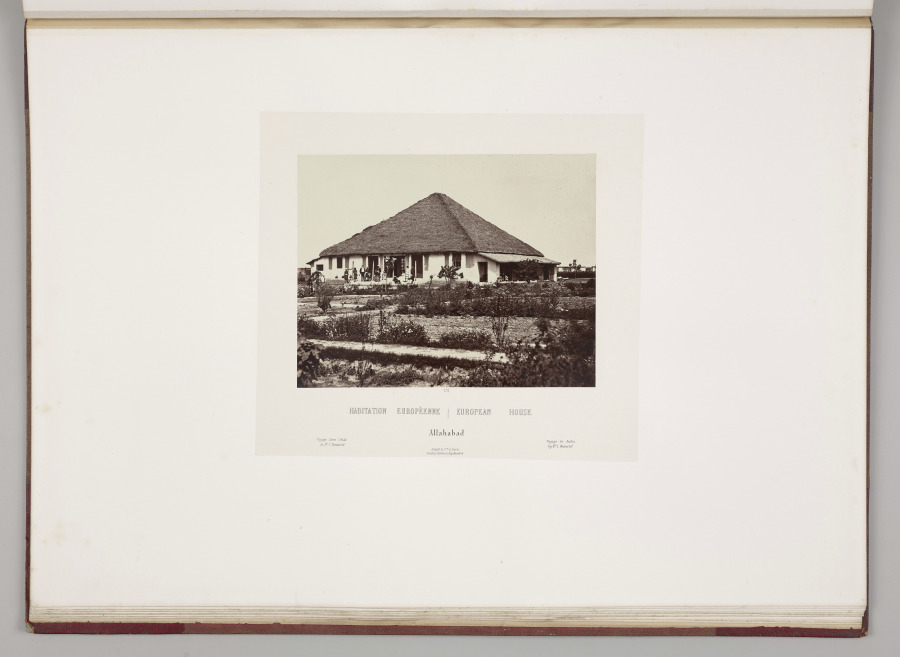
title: European House, Allahabad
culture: France, 19th century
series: India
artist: Louis-Théophile Marie Rousselet (French, 1845–1929)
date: 1865–68, published 1869–70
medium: Albumen print from glass plate negative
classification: Photograph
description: Concerned that his drawings did not do justice to the splendor of India’s monuments, Rousselet learned photography in India that year, a remarkable accomplishment. He proved to be a talented photographer with a sophisticated sense of composition. The scenes in this volume sweep across sites of Sultanate, Rajput, and Mughal power in northern India, from the sacred Hindu city of Varanasi on the Ganges River to Alwar in Rajasthan. Also included are several scenes of industry and portraits of Indian rulers.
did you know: Louis Rousselet described himself as a “scientific traveler” when he went to India alone at age 18 in 1863 and stayed into 1868.